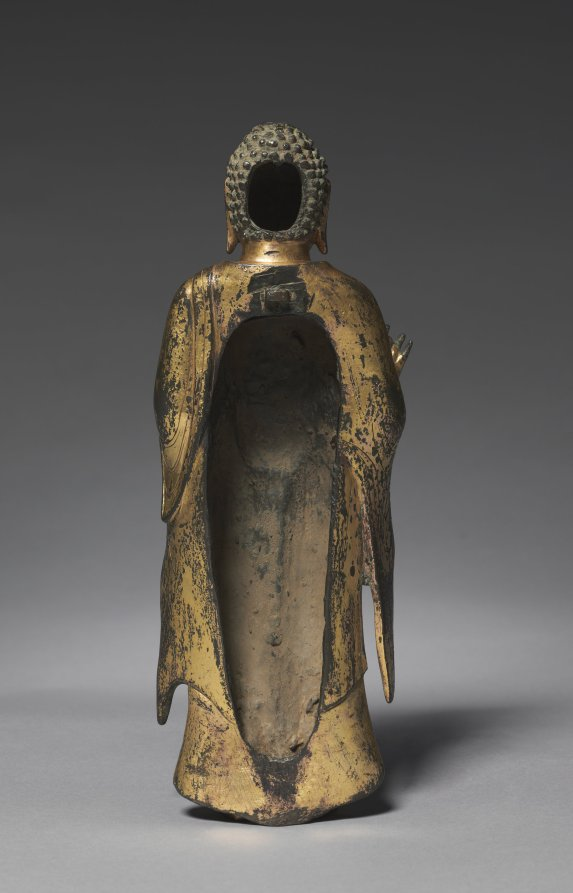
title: Standing Amitabha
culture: Korea, Unified Silla period (676-935)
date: 800s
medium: gilt bronze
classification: Sculpture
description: Buddhist teachings emphasize the pursuit of spirituality, rather than physicality, to achieve enlightenment. This statue’s artist, however, made genuine efforts to represent the divine’s beautiful voluminous body. Inspired by Indian Gupta period art (300s–500s CE), this particular artistic style emphasizing soft modeling and naturalism was further developed in China and flourished across East Asia.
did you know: This Korean statue has a stylistic affinity with statues from the Indian Gupta period (300s–500s CE) that emphasize soft modeling and naturalism.